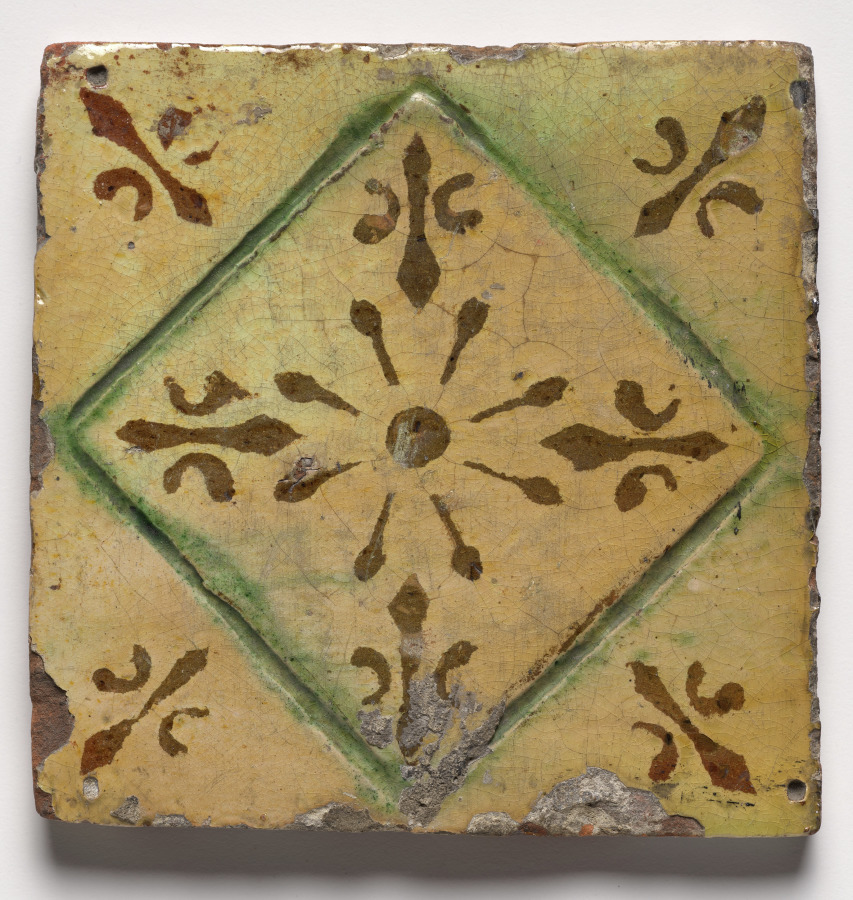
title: Tile- Diamond Medallion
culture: Netherlands, Holland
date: c. 1600s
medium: glazed ceramic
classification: Ceramic